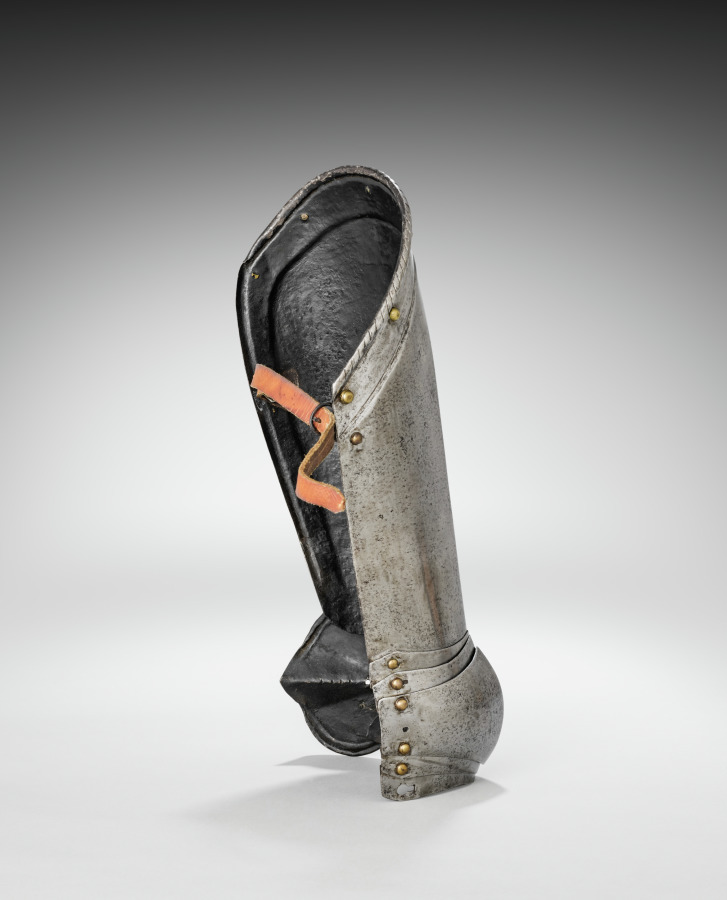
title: Proper Left Cuisse and Knee Cop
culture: South Germany, 16th century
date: c. 1560–1580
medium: steel, leather straps, brass rivets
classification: Arms and Armor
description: This armor was developed for the joust-a sporting combat between two mounted contestants. Although all of the elements of this armor date from the same period, they are not all from the same suit. This armor is thus called "composed." It also shows the asymmetry of jousting armor. The participants rode along a wall-like barrier known as a "tilt" with their left sides facing one another. Consequently, armor on that side of the body had to be thicker. Note the large plate (grandguard) over the left shoulder for extra protection. Also, the breathing holes in the helmet were placed on the right side (farthest from an opponent's lance) to avoid injuries from splinters. The bracket attached to the right breastplate is called the lance-rest, a shock-absorbing support designed to accommodate the lance when "couched" under the right armpit.